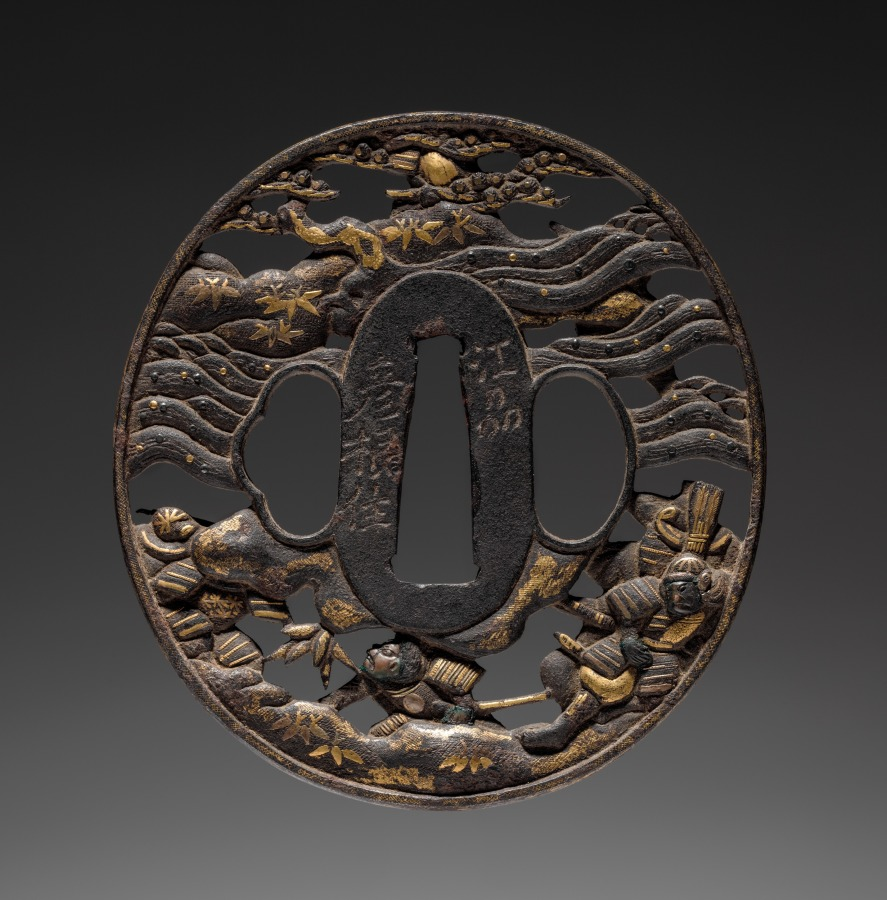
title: Sword Guard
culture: Japan, Edo period (1615–1868)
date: mid-1600s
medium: iron (Soten type)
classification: Arms and Armor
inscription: signed "Soheishi-nyudo Soten."